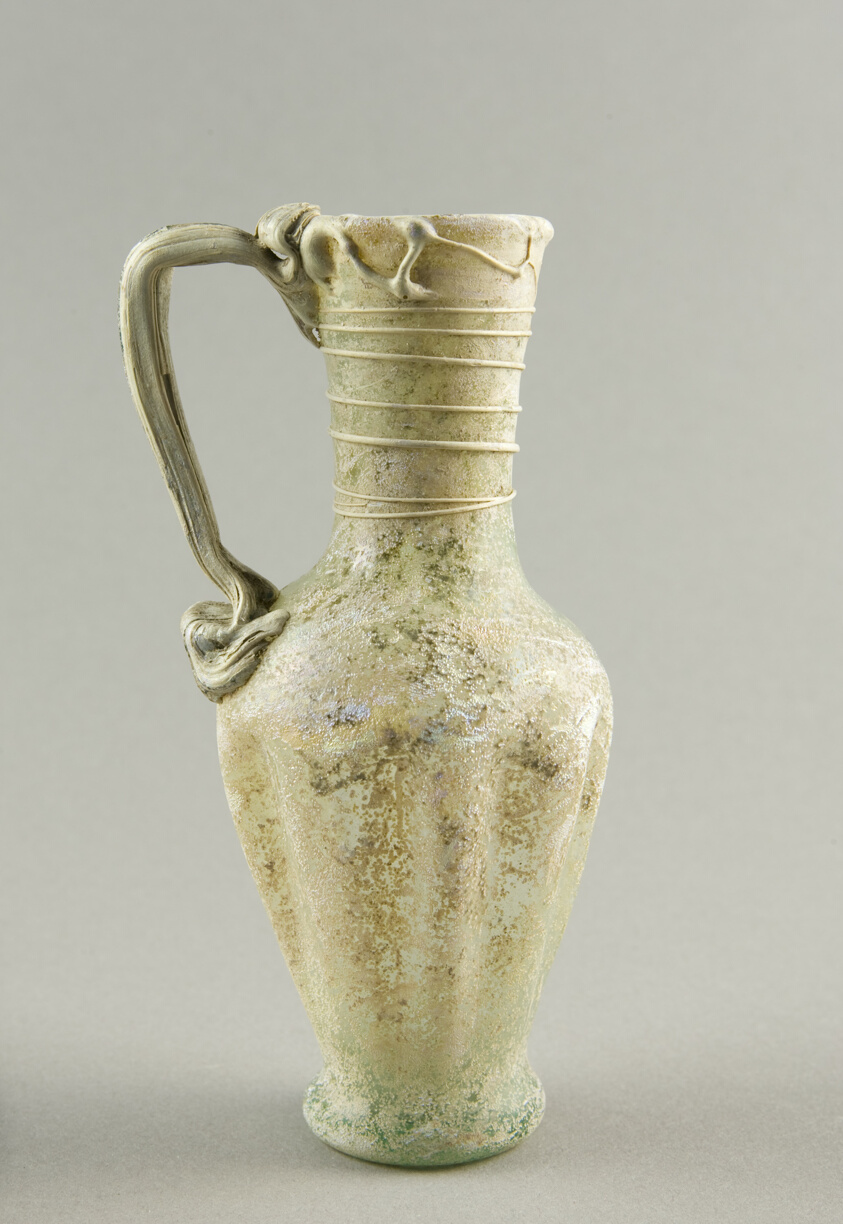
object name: Vessel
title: Pitcher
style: syrian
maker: Roman; Levant or Syria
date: 2nd century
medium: Glass, blown technique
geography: Syria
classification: glass; vessel; ancient art